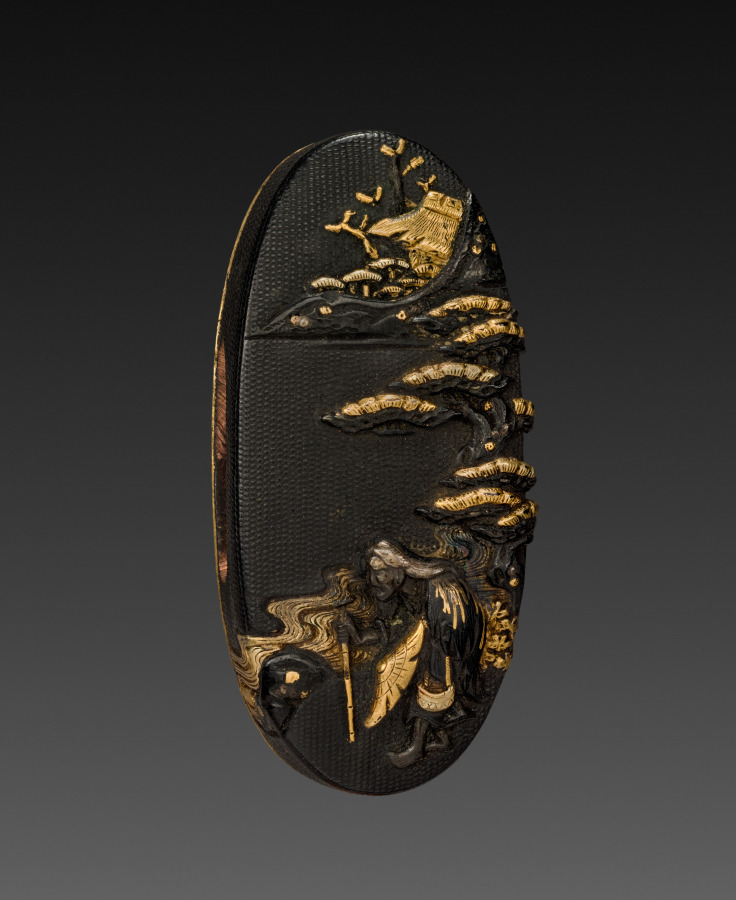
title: Sword-Hilt Pommel (Kashira)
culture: Japan, Edo period (1615–1868)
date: 1700–1850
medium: shakudo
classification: Arms and Armor